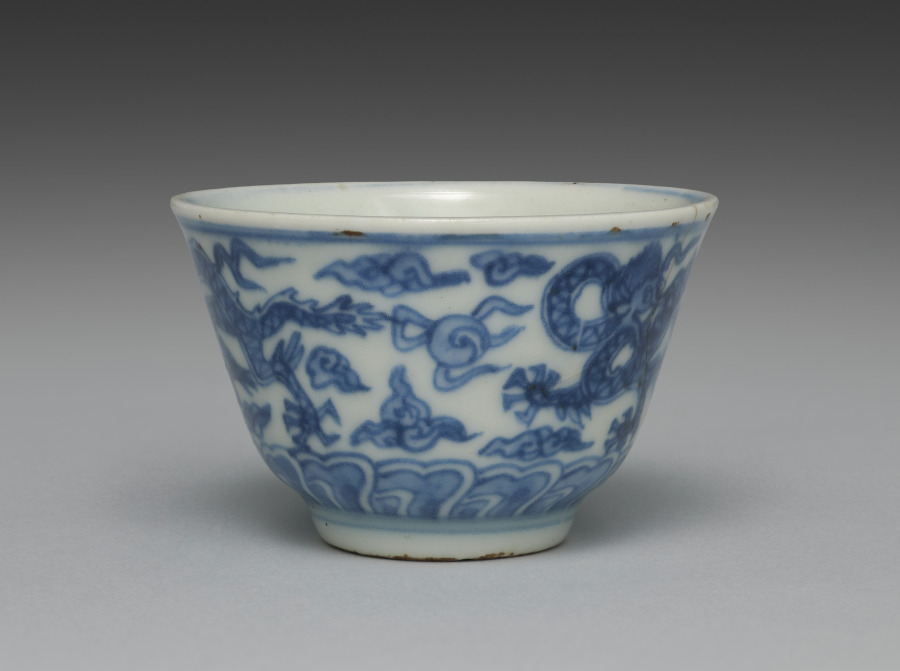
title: Cup from Tea Cups with Dragons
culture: Japan, Edo period (1615–1868)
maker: Seifū Yohei I (Japanese, 1801–1861)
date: 1840s–57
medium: One from a set of five tea cups; porcelain with underglaze blue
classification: Ceramic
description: Seifū Yohei I made both blue and white porcelains after Ming dynasty (1368–1644) Chinese wares fired in the kilns at Jingdezhen for export. He also made colorful stoneware in the style of his teacher, Nin’ami Dōhachi (Takahashi Dōhachi II) (1783–1855).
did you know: A small figure of an elephant serves as the handle for the lid.